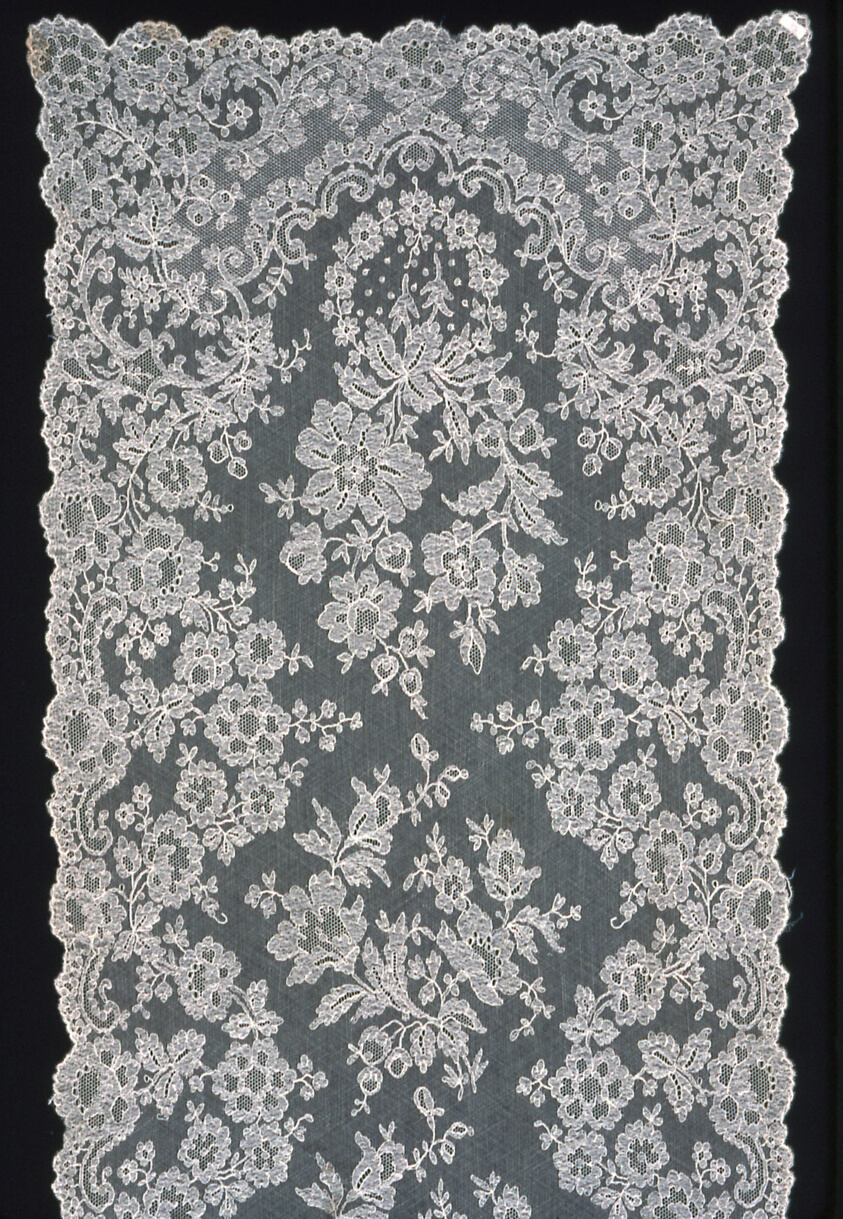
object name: Textile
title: Stole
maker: England, Nottingham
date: 1850/75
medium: Cotton and linen, Pusher machine lace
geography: Nottingham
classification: textile; lace - machine